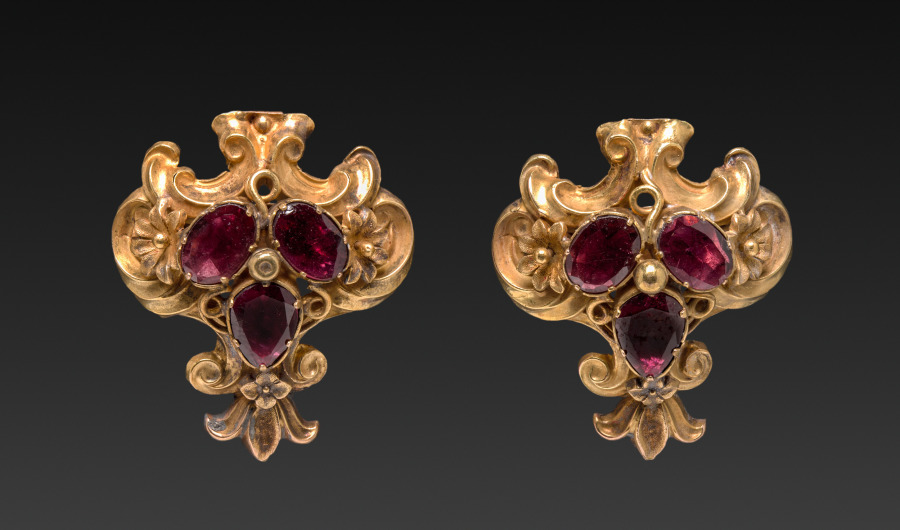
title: Earring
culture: Germany, possibly, 19th century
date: c. 1840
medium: gold and jewels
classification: Jewelry